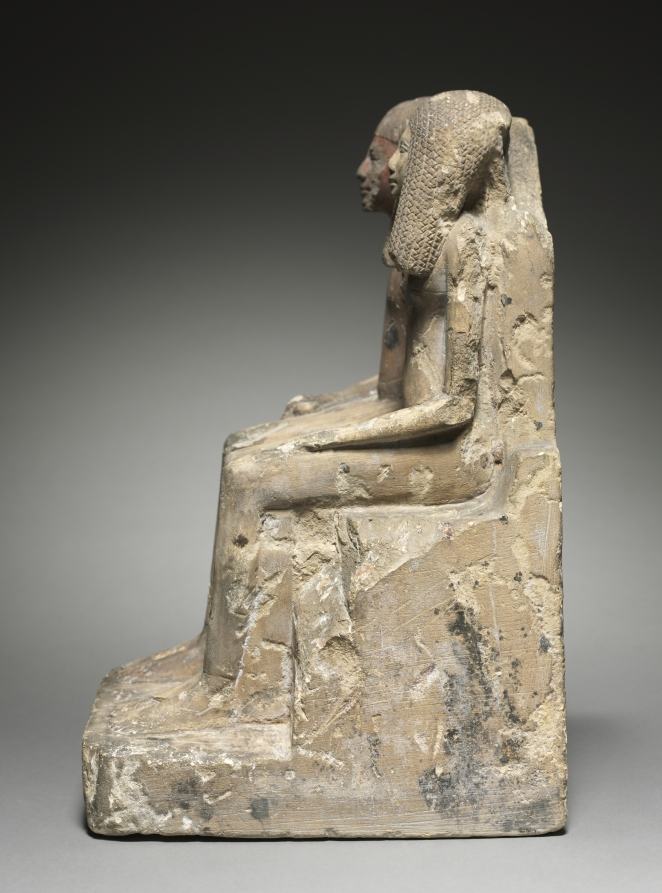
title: Seated Pair Statue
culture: Egypt, New Kingdom (1540–1069 BCE), Dynasty 18, reign of Tuthmosis III (1479–1425 BCE)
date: c. 1479–1425 BCE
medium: painted limestone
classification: Sculpture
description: Ka statues were the dwelling places for the spirits of the deceased. These sculptures—some larger than life-size—were placed in a niche in the back of the tomb.